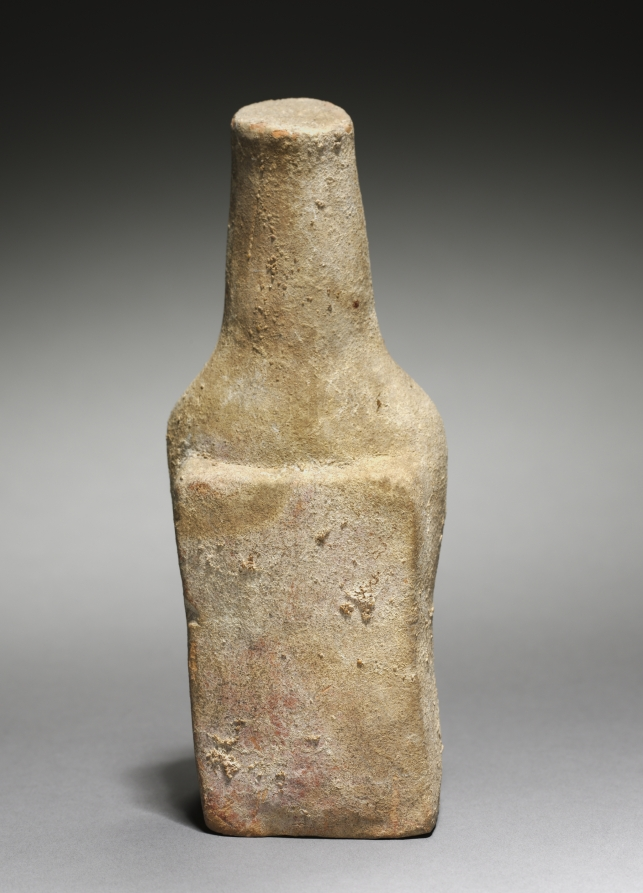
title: Seated Goddess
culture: Greece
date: 500s BCE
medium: terracotta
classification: Sculpture